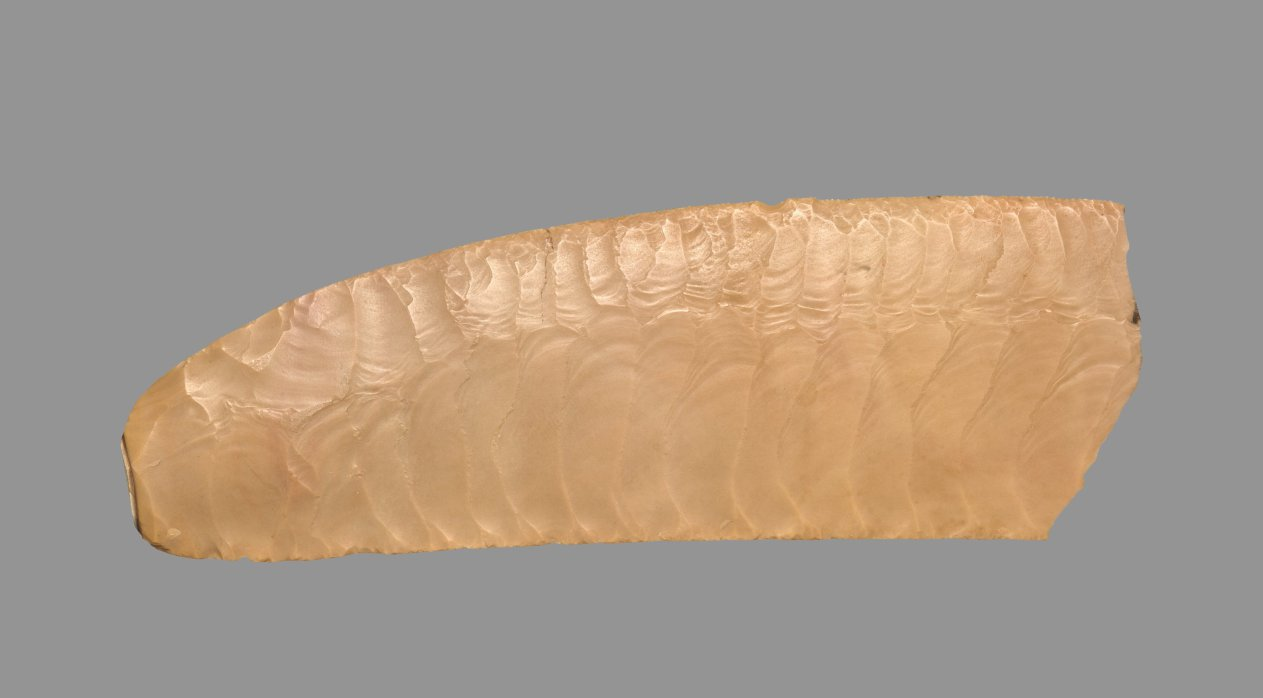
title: Ripple-Flaked Knife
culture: Egypt, Haraga, cemetery G, tomb 413, excavated in 1914, Predynastic (5000–2950 BCE), Naqada IIc–IIId (3650–3000 BCE)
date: 4000–3000 BCE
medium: flint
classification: Implements